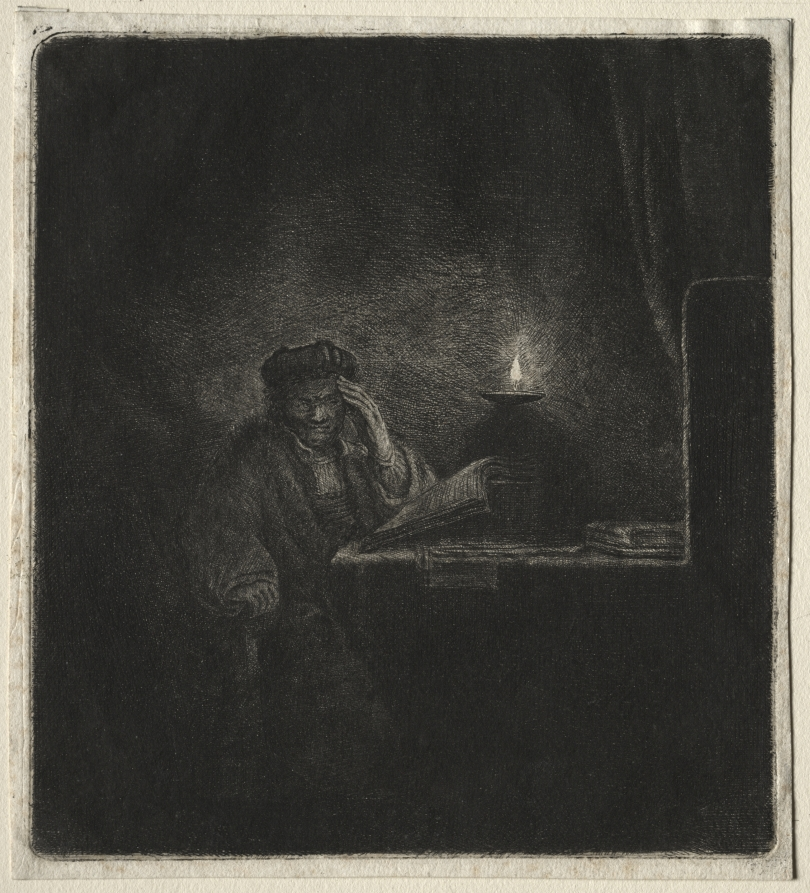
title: Copy of Student at a Table by Candelight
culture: Netherlands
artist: copy after Rembrandt van Rijn (Dutch, 1606–1669)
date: 1654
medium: etching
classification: Print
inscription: VERSO, upper right, in graphite: 14 ; left center, in graphite: 4988 ; lower left, in graphite: Homme meditant Gers 110. ; lower left, in pen and black ink: Joseph Camesina / belle. ; lower left, in graphite: 798- ; lower left, in graphite:148 2de ou 3me Ep ; lower left, in graphite: B 148 2nd state ; lower center, in graphite: IV state ; lower right, in graphite: y[l?] ; lower right, in graphite: R.H ; lower right, in graphite: N. 2613 ; lower right, in graphite: [B 197?]